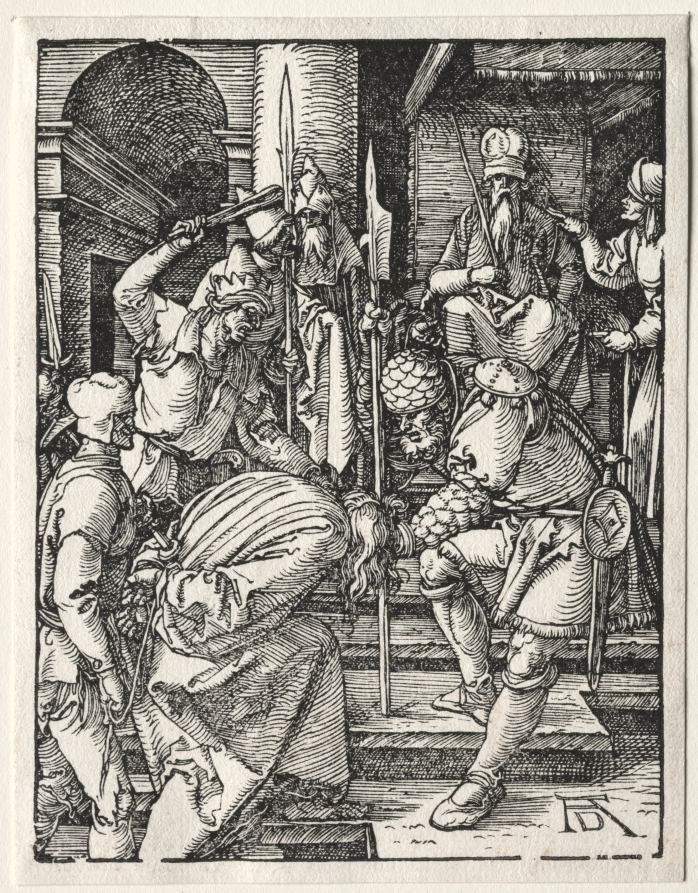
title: The Small Passion: Christ Before Annas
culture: Germany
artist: Albrecht Dürer (German, 1471–1528)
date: 1509–1511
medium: woodcut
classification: Print